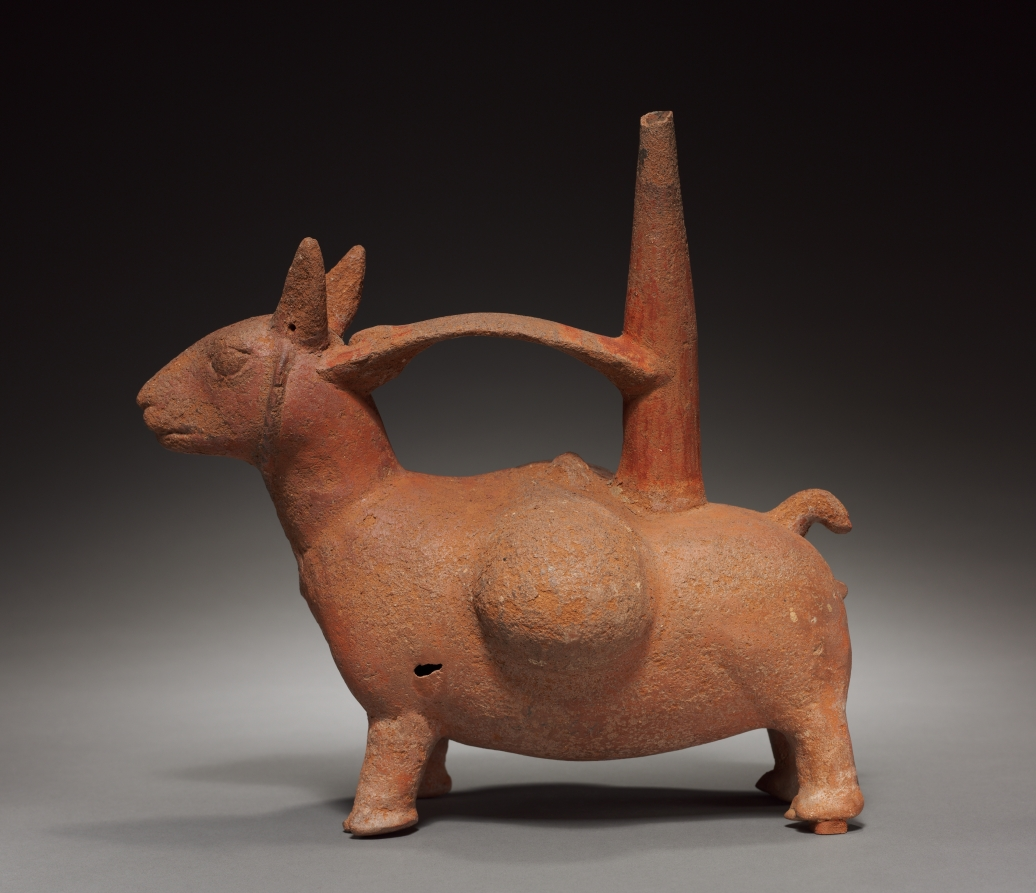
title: Llama with Packs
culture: Peru, Chimú or Inca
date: before 1532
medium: pottery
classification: Ceramic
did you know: The llama was the only burden-bearing animal, aside from humans, in ancient South America.